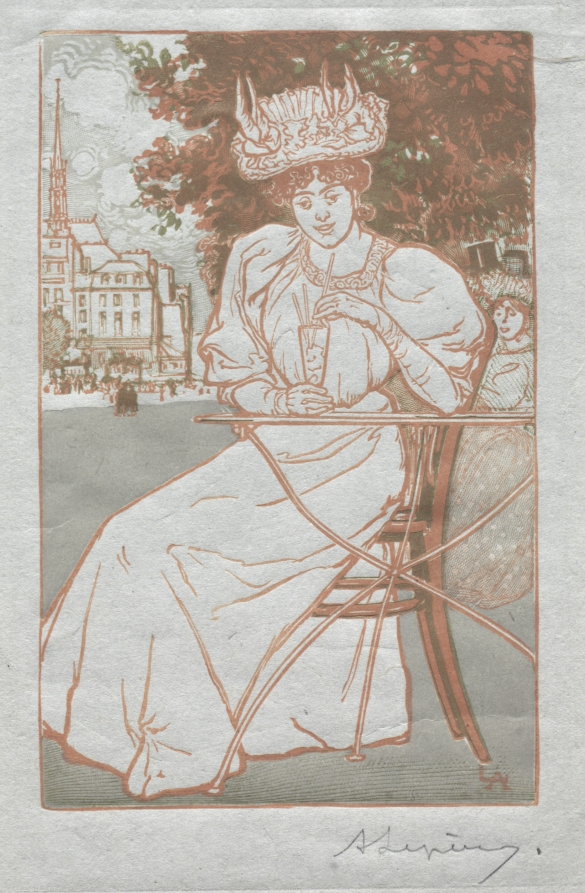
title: Paris Almanac, 1897: Summer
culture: France, late 19th Century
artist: Auguste Louis Lepère (French, 1849–1918)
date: 1897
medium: wood engraving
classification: Print